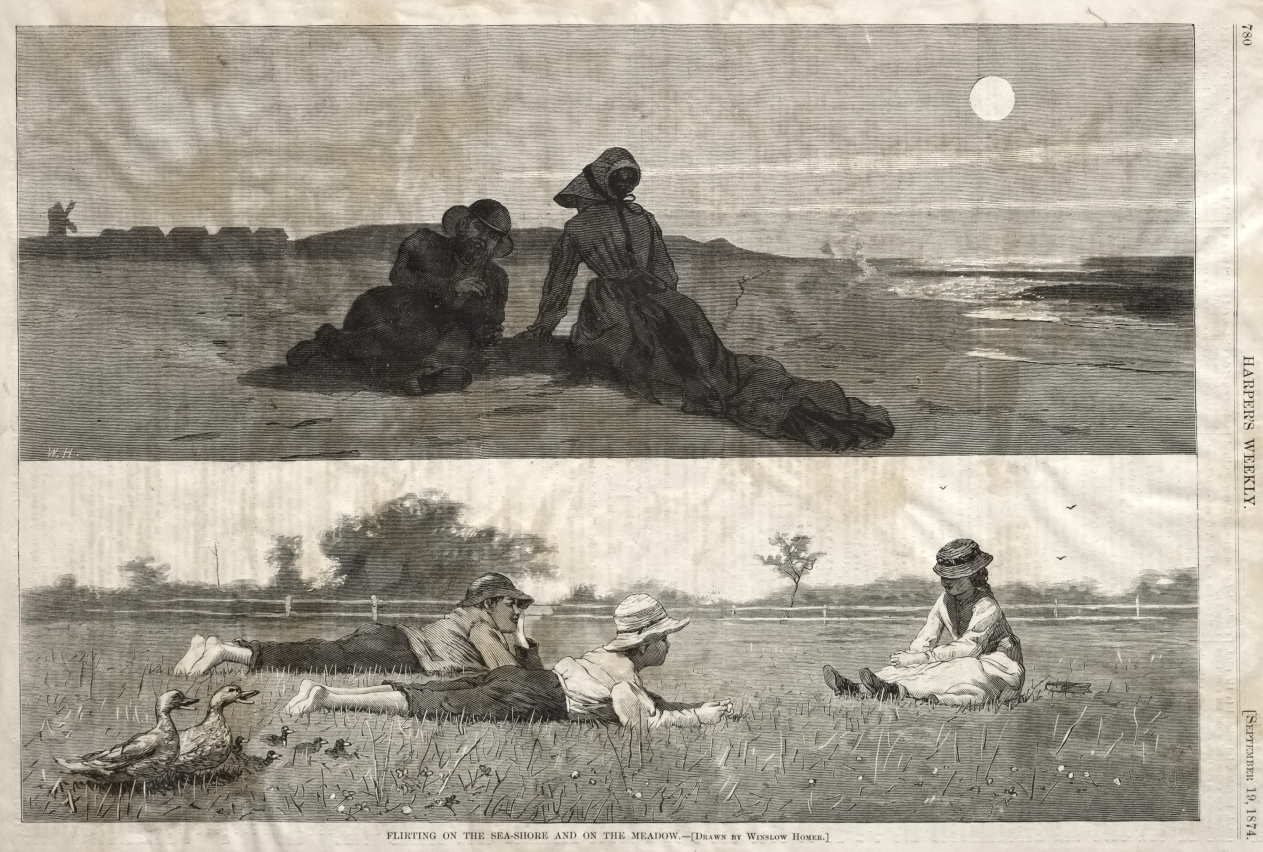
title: Flirting on the Seashore and on the Meadow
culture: America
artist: Winslow Homer (American, 1836–1910)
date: 1874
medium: wood engraving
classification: Print